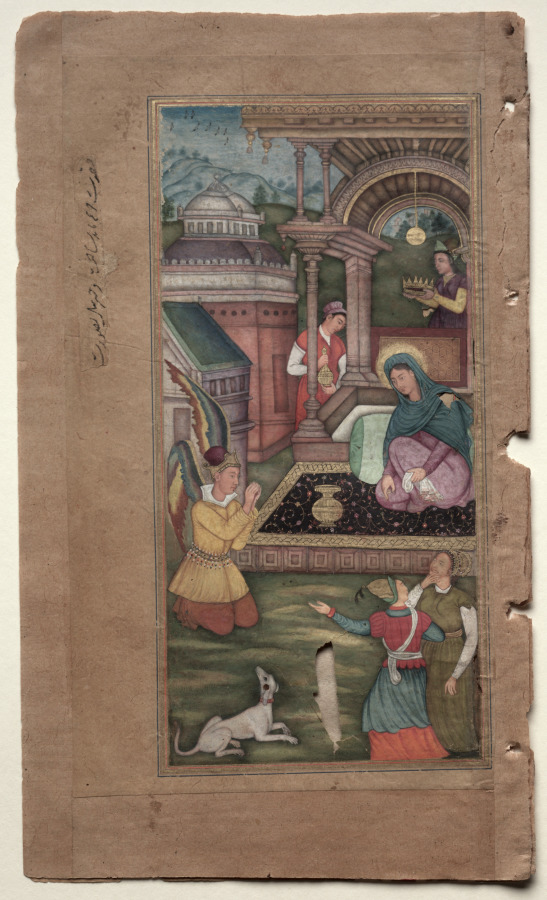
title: The Annunciation (folio 15 recto), from a Mirror of Holiness (Mir’at al-quds) of Father Jerome Xavier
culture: Mughal India, Allahabad, made for Prince Salim (1569–1627)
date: 1602–4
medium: Gum tempera, ink, and gold on paper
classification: Manuscript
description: Mary gazes down at the angel Gabriel as he kneels reverently, like a humble messenger, delivering the news that Mary will give birth to the son of God. His multicolored wings are forced within the boundary line of the painting field, visually implying a sense of subordination. Unlike many of the paintings in the Mirror of Holiness, the Annunciation is a familiar subject in European art, but the emphases vary. The Indian version depicts her as a queen, with a crown held above her head and attendants standing by.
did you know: The text states that Mary was only age 13 1/2 when the angel Gabriel came to her.